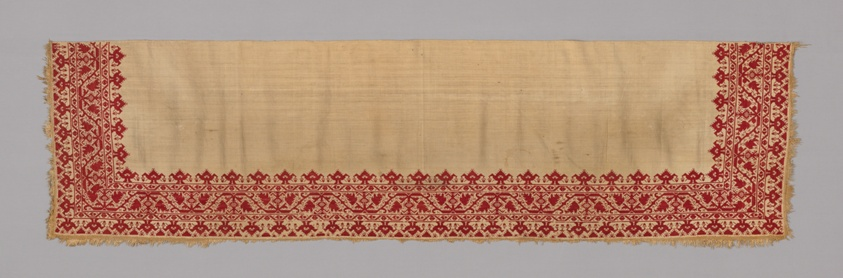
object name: Textile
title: Valance (For a Bed)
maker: Greece, Cyprus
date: 18th century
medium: Linen, plain weave; embroidered with silk in cross and long-armed-cross stitches; needlemade edging of Antwerp edge stitches and countered two-strand warp twining with extended warp fringe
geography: Cyprus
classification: textile; needlework (visual works)